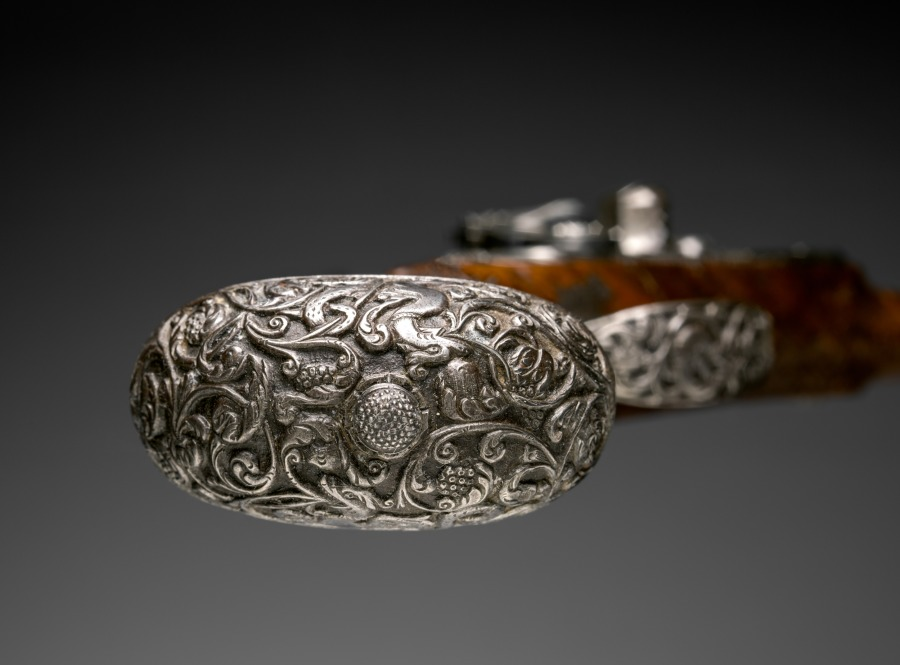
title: Flintlock Pistol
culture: Italy, Brescia, late 17th century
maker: Gio Borgognone (Italian)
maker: Lazarino Cominazzo (Italian)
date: c. 1690–1700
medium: steel, chiseled steel with walnut stock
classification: Arms and Armor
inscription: barrel signed: Lazarino Cominazzo; lockplates signed: Gio Borgognone in Bresia